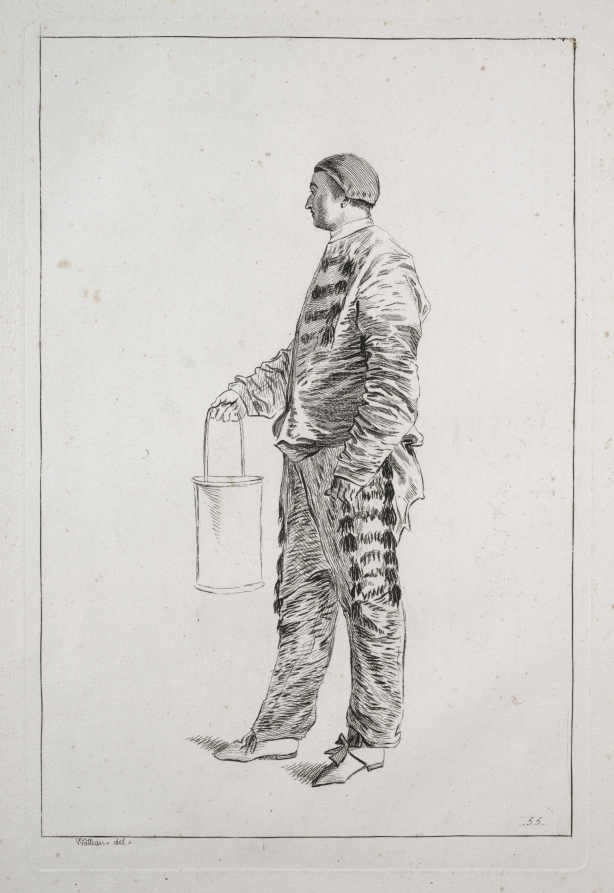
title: Man Standing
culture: France, 18th century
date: 1700s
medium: etching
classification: Print